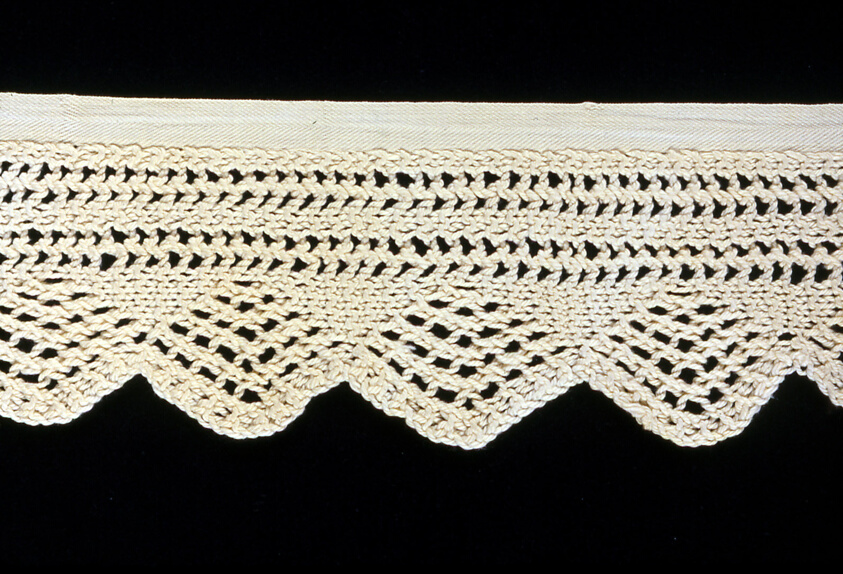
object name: Textile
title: Border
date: 1875/1900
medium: Cotton, knitting; attached at top to cotton, twill woven tape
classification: textile; needlework (visual works)